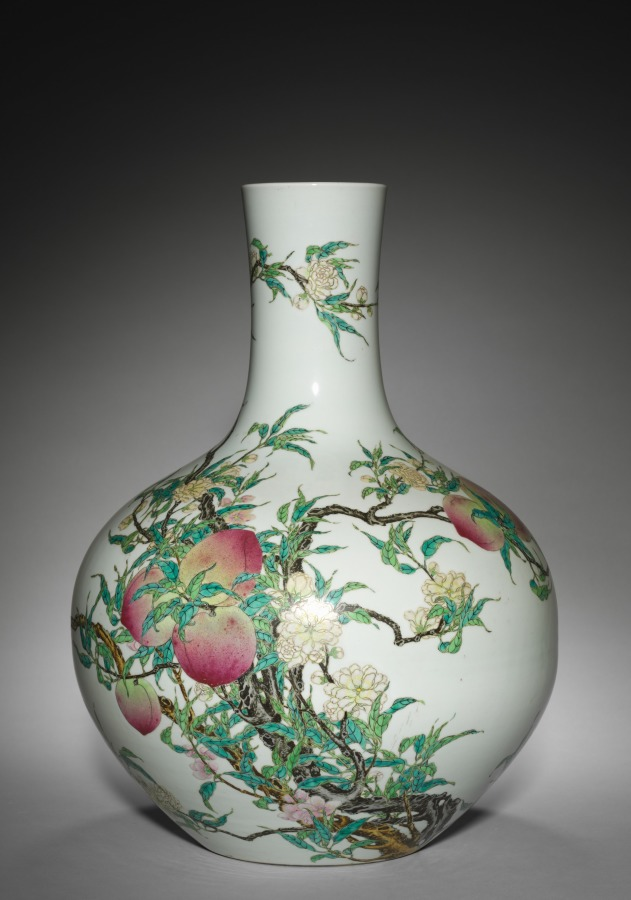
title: Pair of Vases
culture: China, Jiangxi province, Jingdezhen, Qing dynasty (1644-1911), Qianlong mark and period (1736-1795)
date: 1736–95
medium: porcelain with famille rose overglaze enamel decoration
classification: Ceramic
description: This spectacular vase, one of a pair in the collection, depicts flowering and fruiting peach trees to convey an auspicious message of affluence and long life. Developments in enamel technology led to new possibilities in polychrome decoration of Qing imperial porcelains. Pinks appeared, lending their name to the new palette of overglaze colors (famille rose), and the addition of opaque white allowed painters to vary the value of pigments, enhancing the painterly quality of porcelain decoration.